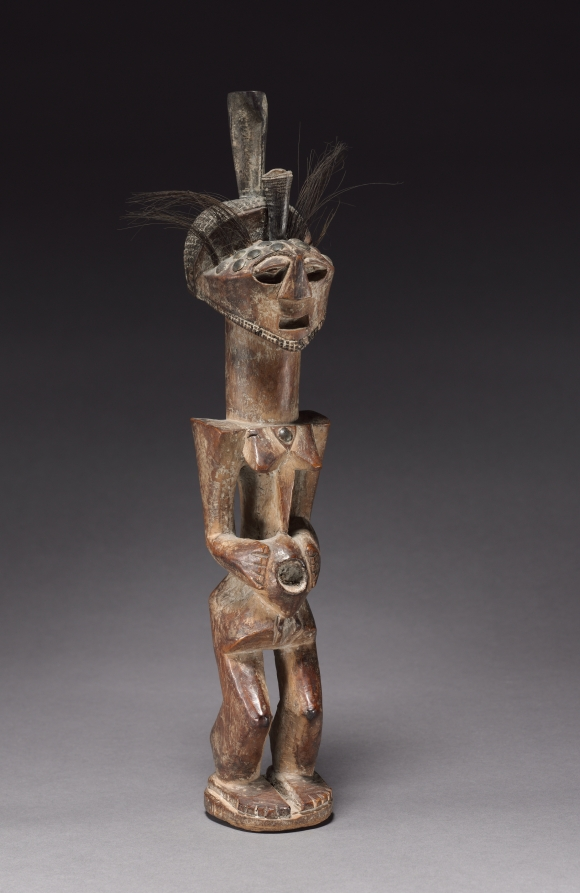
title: Female Figure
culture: Africa, Democratic Republic of the Congo, Songye people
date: late 1800s-early 1900s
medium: Wood, upholstery studs, antelope horns, and animal hair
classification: Sculpture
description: Mankishi figures were believed to have magical powers and were used by diviners to contact spirits in otherworldly realms. Smaller, personal power figures were used to connect with “common” ancestors, while the larger Mankishi figures contacted higher-ranking ancestral spirits. These power figures were kept in their own personal spaces because of their powerful status, and could only be handled by their designated nkunja, or guardian.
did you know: Because this Mankishi is neither small or quite large in size, it was most likely used by a family rather than an individual.